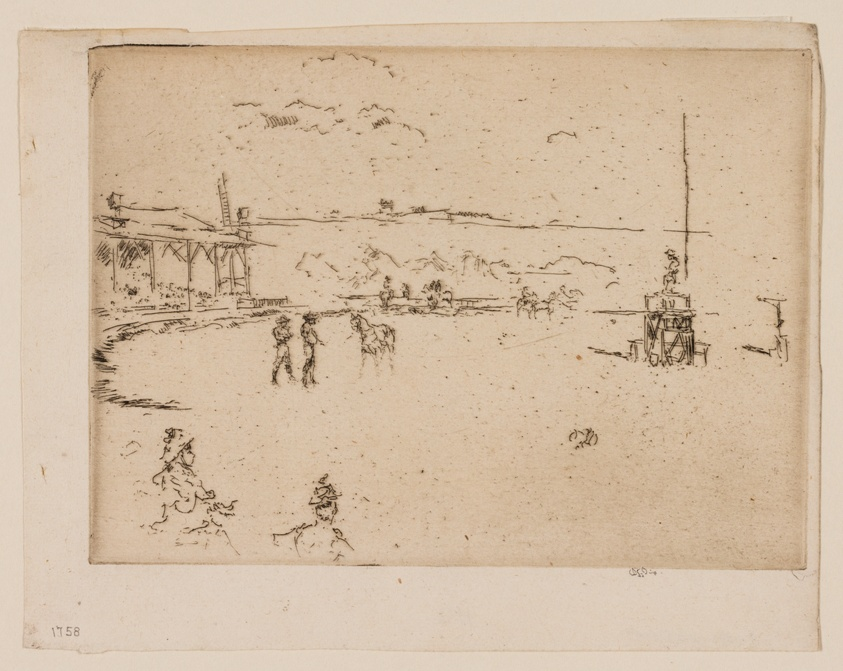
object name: Print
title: Wild West: The Orator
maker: James McNeill Whistler (American, 1834-1903)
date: 1887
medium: Etching with foul biting in black ink on cream laid paper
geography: United States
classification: etching; foul biting; print; prints and drawing; paper